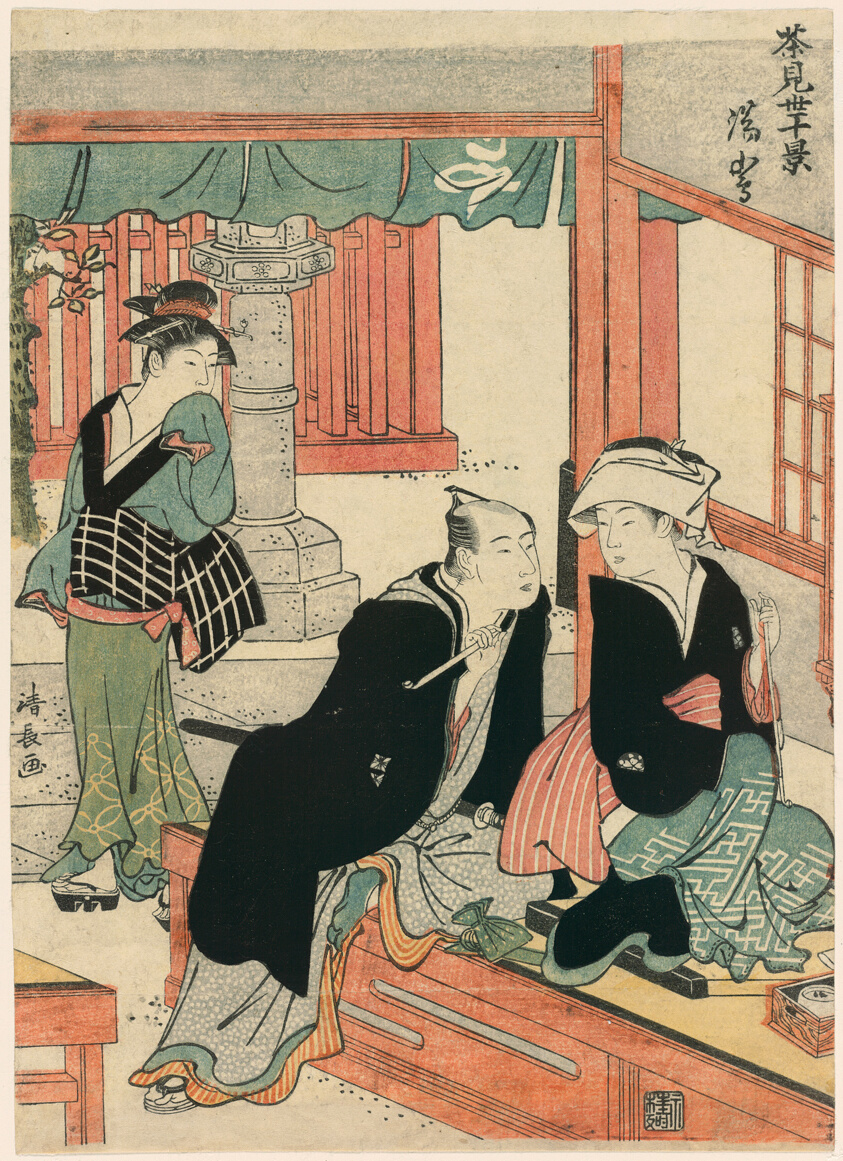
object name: Print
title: Yushima from the series Scenes of Ten Teahouses (Chamise jikkei)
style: Japanese (culture or style)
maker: Torii Kiyonaga (Japanese, 1752-1815)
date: c. 1783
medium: Color woodblock print; chuban, nishiki-e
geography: Japan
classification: woodblock print; print; asian art